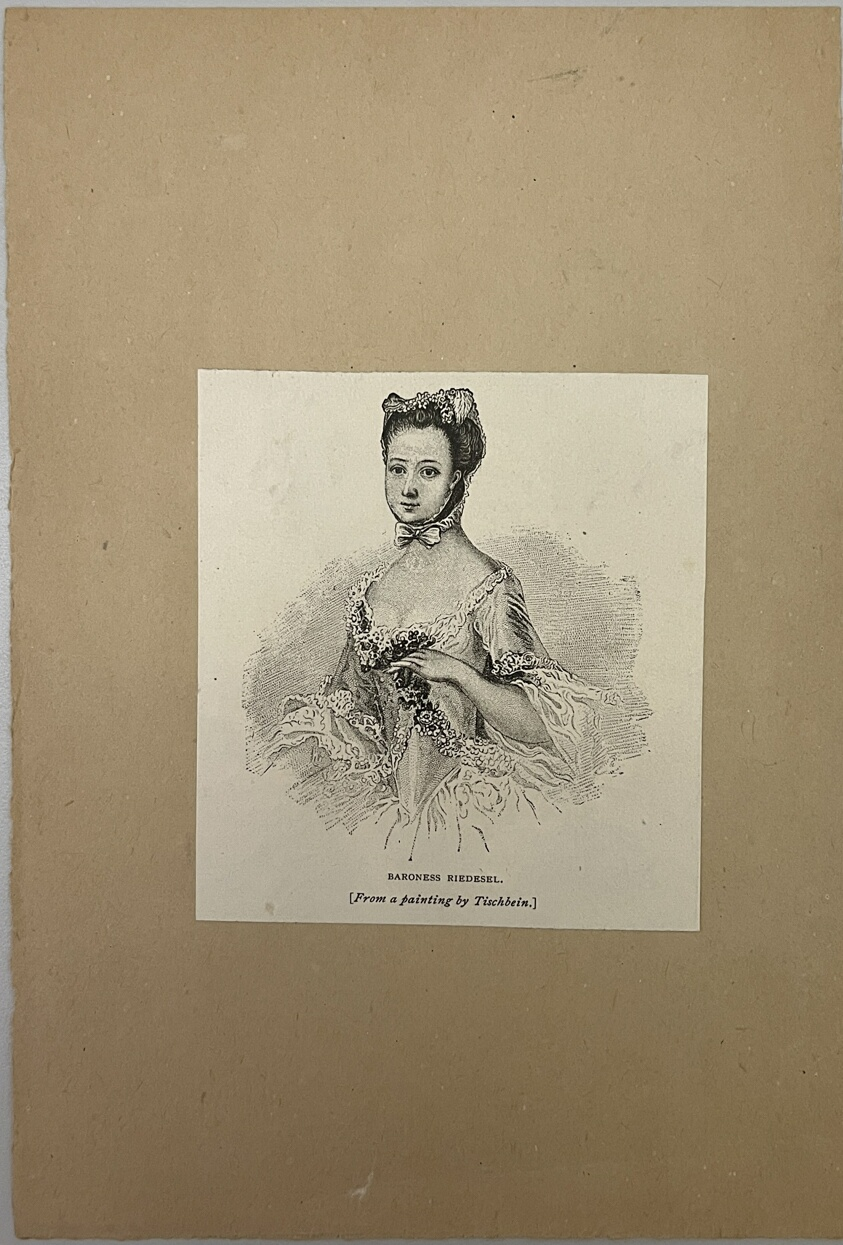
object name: Print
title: Baroness Riedesel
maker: Likely John Chester Buttre (American, 1821-1893); after Johann Friedrich August Tischbein (German, 1750-1812)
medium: Lithograph on paper pasted on paper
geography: United States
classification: reproduction; print; prints and drawing